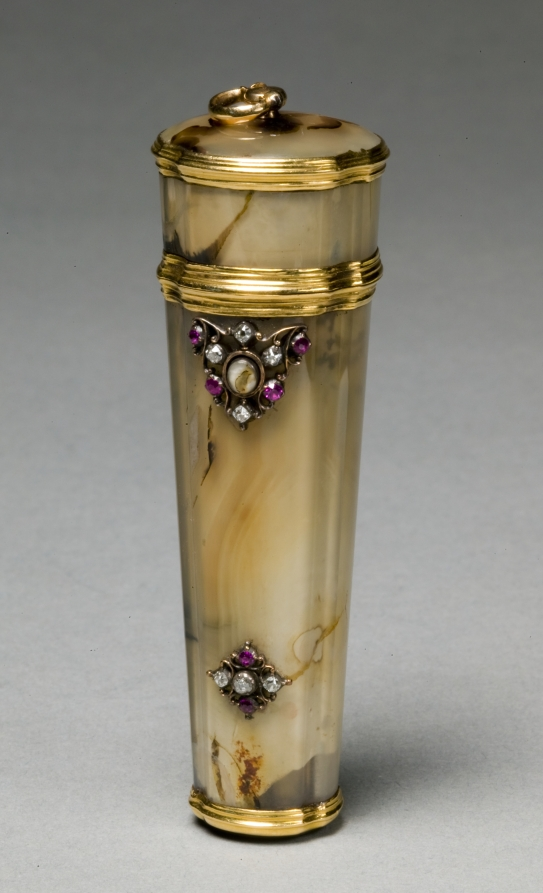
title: Vanity Case (Etui)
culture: England, mid 18th century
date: c. 1745–60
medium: gold mounted agate, diamonds, rubies, interior fitted with implements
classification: Miscellaneous